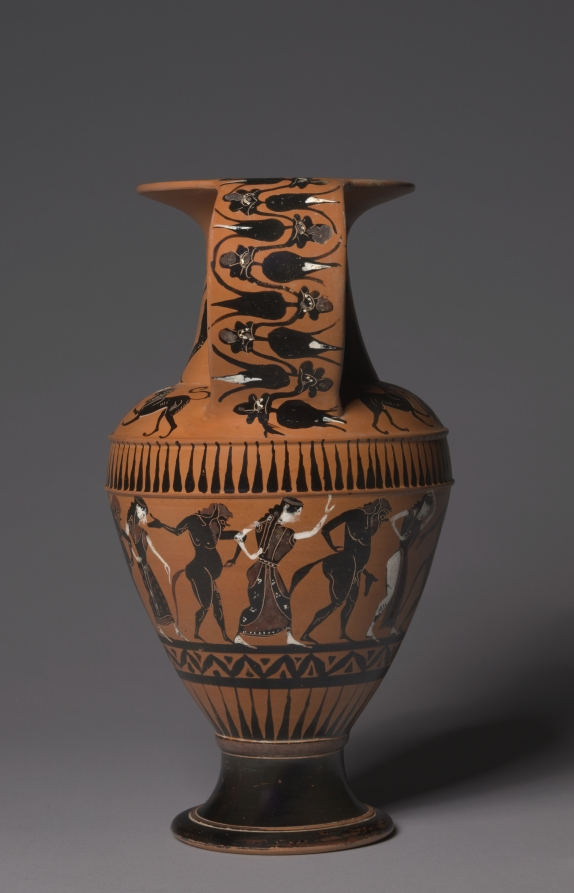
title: Black-Figure Nikosthenic Amphora (Storage Vessel): Dancing Youths; Sphinxes and Lions; Satyrs and Maenads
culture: Greek, Attic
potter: signed by Nikosthenes (Greek, Attic, active c. 545–510 BCE)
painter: attributed to Painter N, Thiasos Group (Greek, c. 530–510 BC)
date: c. 530–510 BCE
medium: ceramic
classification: Ceramic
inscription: inscription Under handle A/B:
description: The distinctive shape of this amphora—wide strap handles, conical neck, and ribs running around the upper body—is a trademark of the potter Nikosthenes, who signed his name below the partially restored handle (together with the verb EPOIESEN, for “made”). Nikosthenes signed nearly 150 surviving vases, more than any other named potter or vase-painter. Made in Athens with an Etruscan clientele in mind, Nikosthenic amphorae emulate precious metal and ceramic bucchero vases made in Etruria (central Italy), where many examples have been discovered. The painted figures include dancing youths (on the neck), sphinxes between lions (on the shoulder), and a continuous procession of dancing satyrs alternating with women (on the body).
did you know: The painter of this vase decorated nearly every available surface; the undecorated handle section is modern.